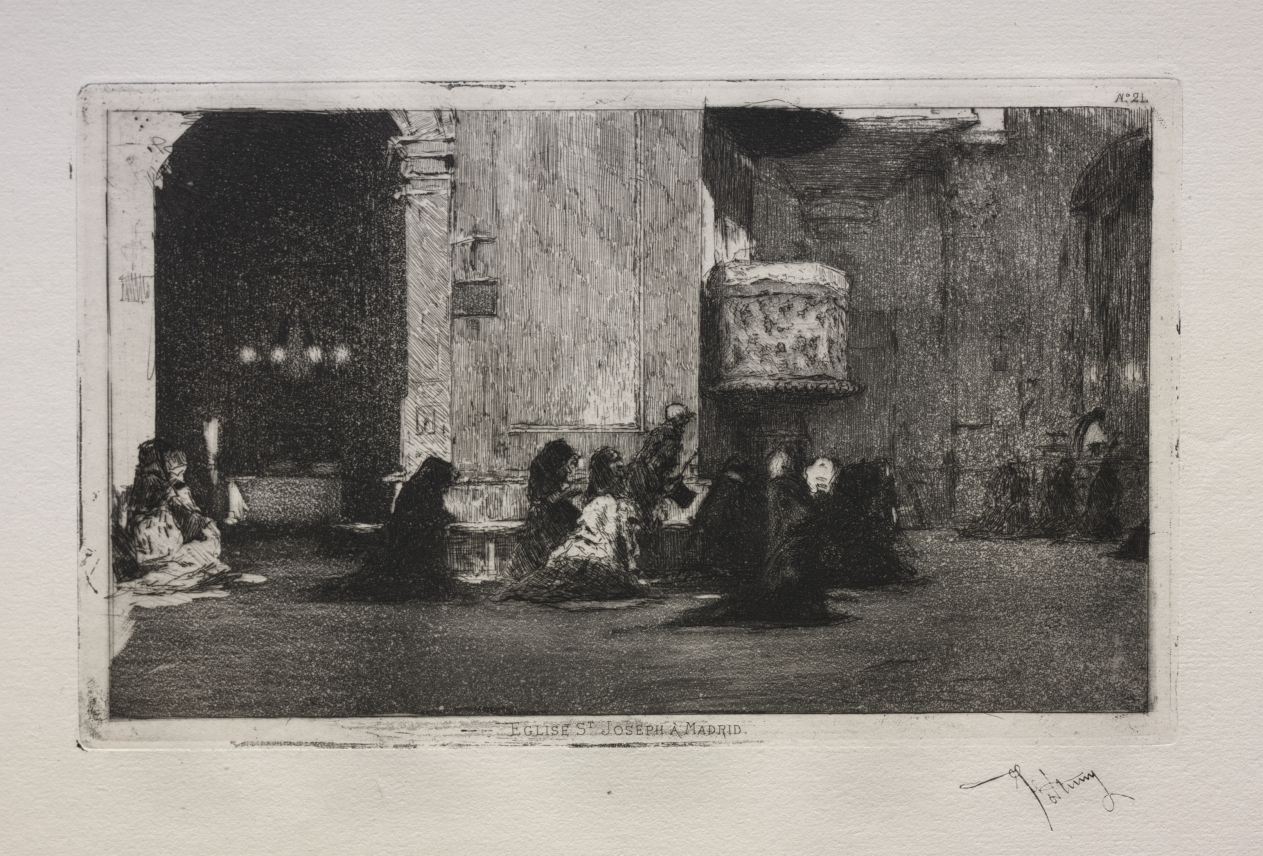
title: Saint Joseph Church, Madrid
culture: Spain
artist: Mariano Fortuny (Spanish, 1838–1874)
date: c. 1860–70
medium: etching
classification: Print